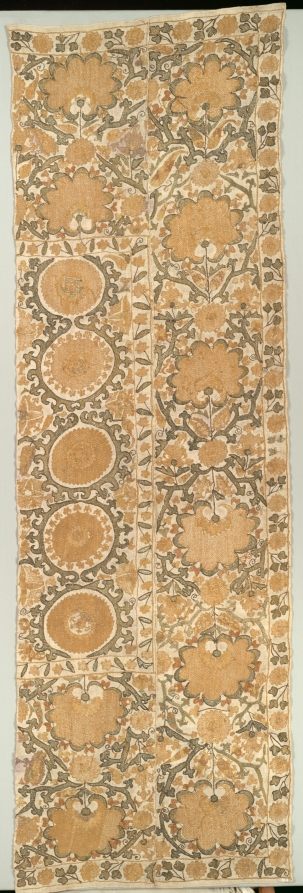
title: Part of a Curtain (Two Widths)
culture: Uzbekistan, Bukhara, 19th century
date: 19th century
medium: silk embroidery on cotton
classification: Embroidery